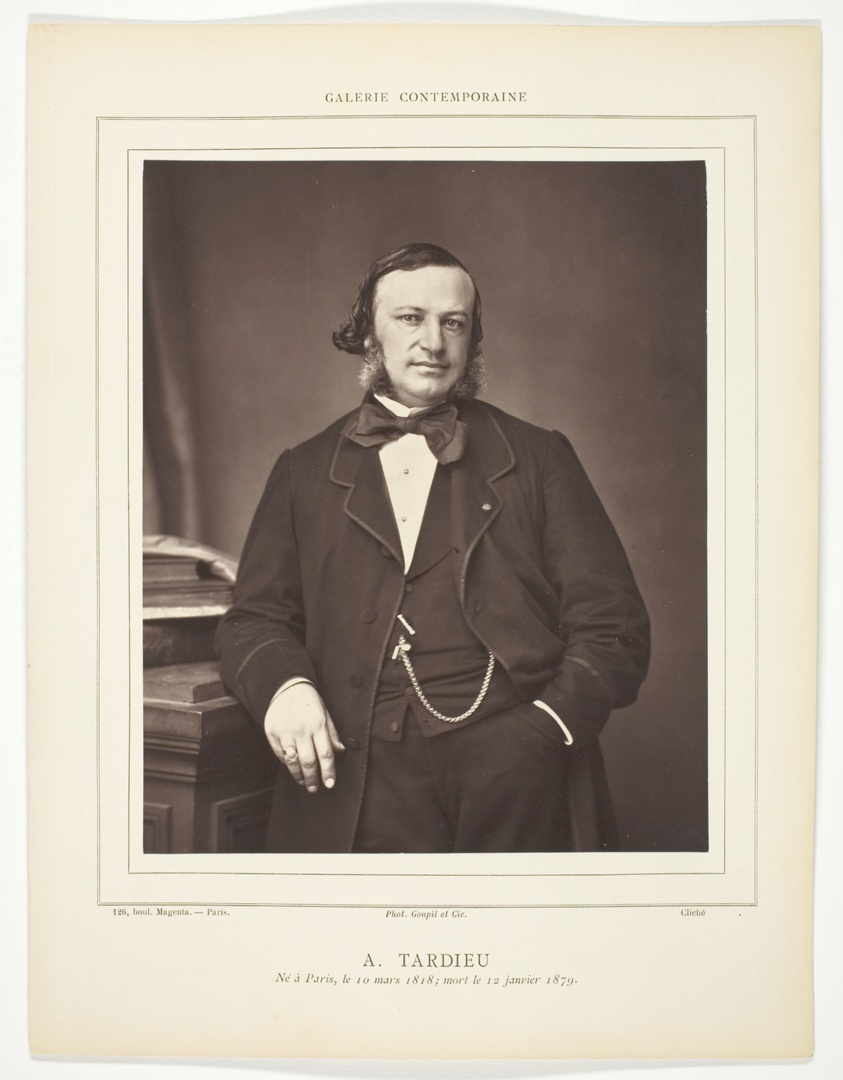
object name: Photograph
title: Auguste Ambroise Tardieu (French doctor and forensic scientist, 1818-1879)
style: 19th century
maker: Goupil and Cie; French, active 1839-1880s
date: 1876/79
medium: Woodburytype, from the periodical “Galerie Contemporaine Littéraire, Artistique” (1879), volume 8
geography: France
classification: woodburytype; photomechanical process; photography; photograph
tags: Collected by Hugh Edwards, Paris, Contemporaine Littéraire